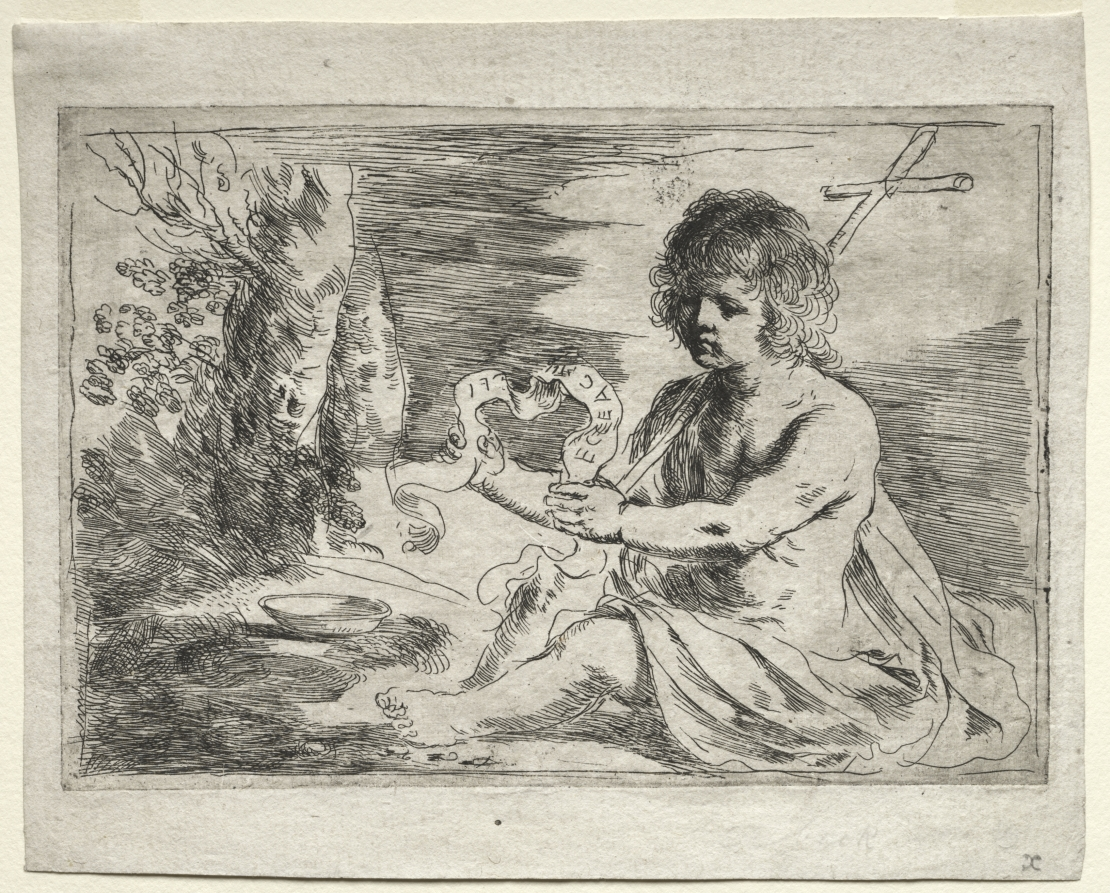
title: St. John the Baptist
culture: Italy, 17th century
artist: Guercino (Italian, 1591–1666)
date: 1650s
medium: etching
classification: Print